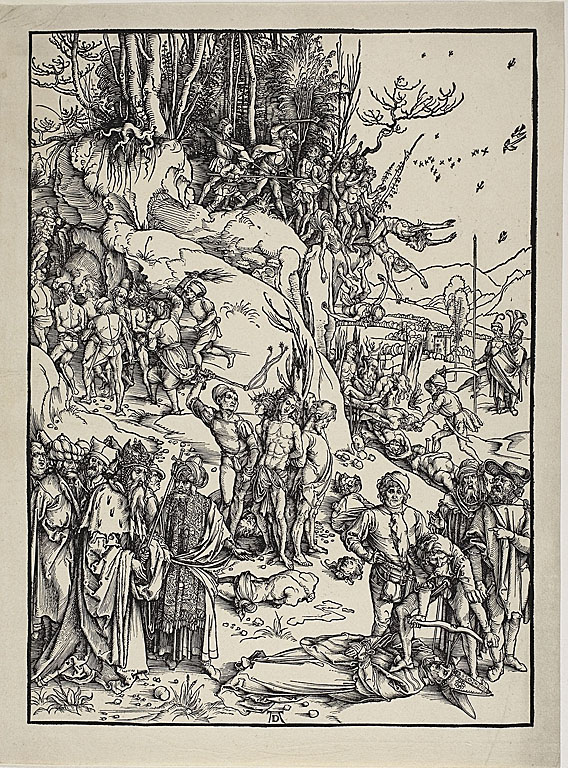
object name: Print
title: The Martyrdom of the Ten Thousand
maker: Albrecht Dürer (German, 1471-1528)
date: c. 1496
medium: Woodcut in black on ivory laid paper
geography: Germany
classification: woodcut; print; prints and drawing; paper